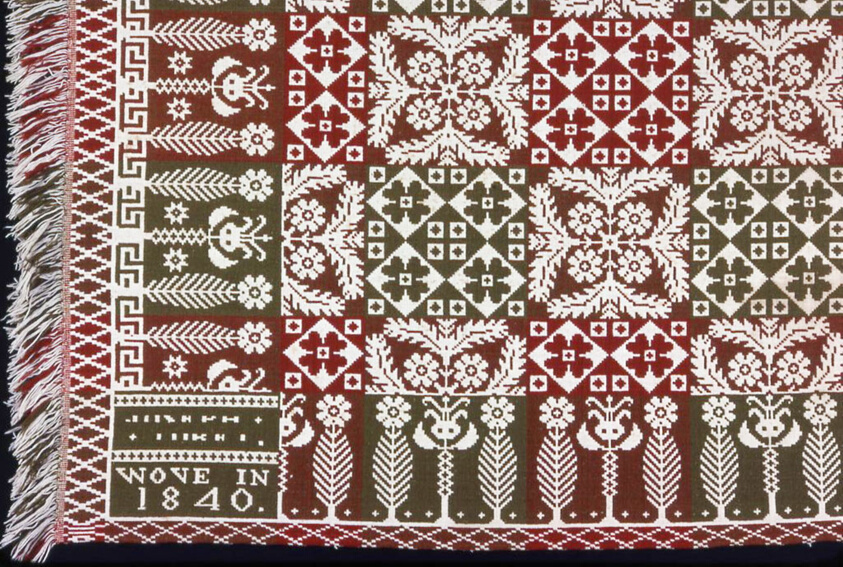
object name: Textile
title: Coverlet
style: 19th century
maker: United States, Pennsylvania, Chester County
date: 1840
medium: Cotton and wool, plain weave double cloth with main warp and extended ground weft fringe; two loom widths joined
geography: Pennsylvania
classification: weaving - coverlet; coverlet; weaving; textile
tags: diamond shapes, foliage, flowers, pine trees, lines, keys, squares, coverlet